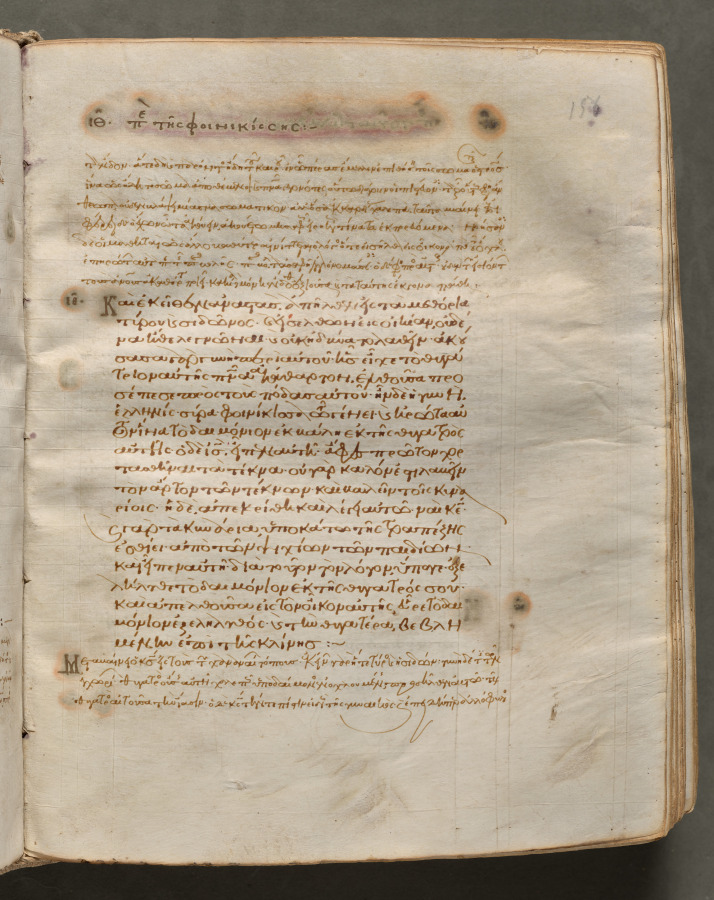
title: Text, folio 156 (recto), from a Gospel Book with Commentaries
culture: Byzantium, Constantinople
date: c. 1000–1100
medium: ink, tempera, and gold on vellum; leather binding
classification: Bound Volume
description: Each of the four gospels in this book opens on a page with brilliantly illuminated borders depicting the author of the text as well as birds-principally peacocks, symbols of the immortality of the soul-and fountains, representing the fountain of life and the salvation of the soul. This volume consists of 428 leaves with texts in Greek. Its level of sophistication suggests that it was probably written and decorated in a monastery in Constantinople.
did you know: Gospel Books were carried in procession through Byzantine churches.